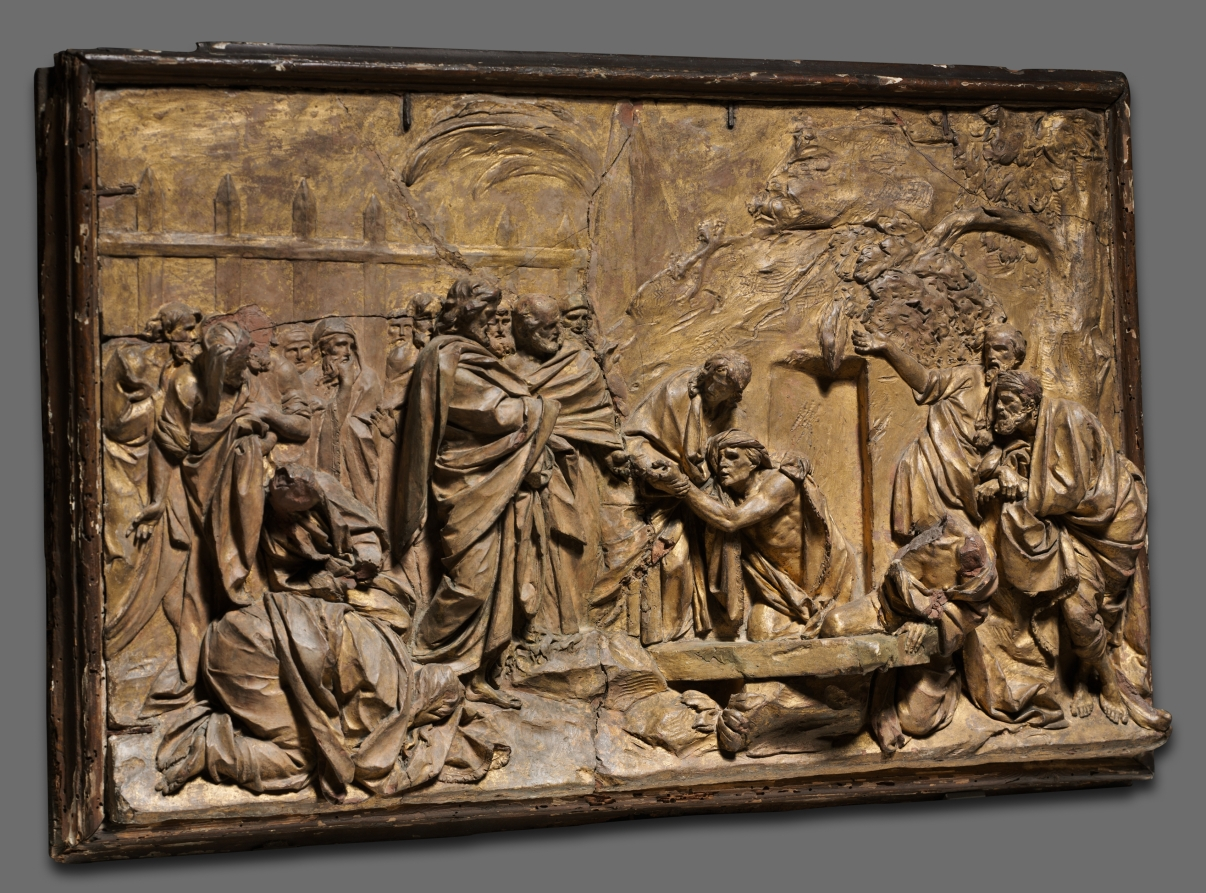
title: The Raising of Lazarus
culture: Italy, Rome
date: c. 1725–50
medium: gilded terracotta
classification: Sculpture